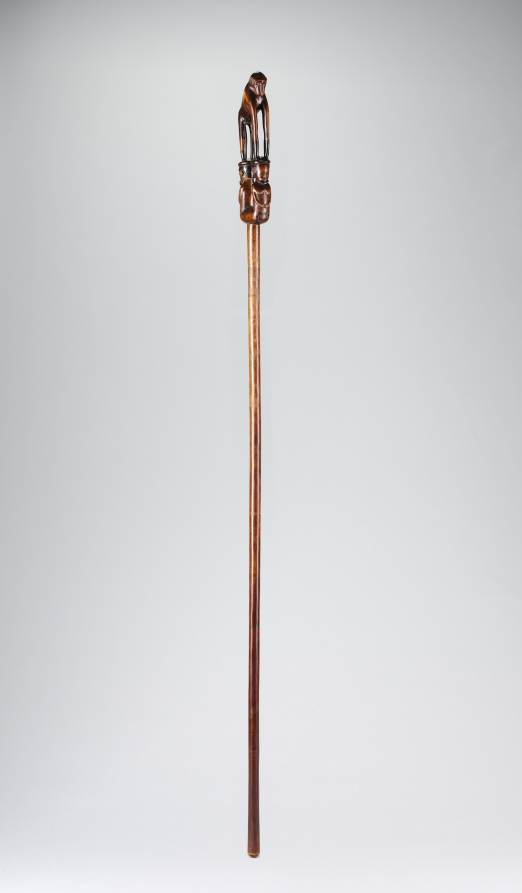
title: Staff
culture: Africa, South Africa, South Africa or Mozambique, probably Tsonga peoples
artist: The Baboon Master (probably Tsonga peoples)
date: 1800s–1900s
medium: Wood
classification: Sculpture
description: Arguably the finest surviving carving of the Baboon Master in a Western collection, this staff features exceptionally sophisticated articulation and detailing. The circular pokerwork motif on one side—which echoes the treatment of the ears on the male heads supporting the baboon—may represent a shield or a leaf. The heads feature the characteristic ornament that signifies maturity and marriage; covered with a mixture of gum, charcoal, and oil, this hairdo, called isicoco, employed a fiber or sinew ring into which the wearer’s hair was woven.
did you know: Artists working on the African continent often moved from place to place; the artist nicknamed The Baboon Master was of the Tsonga culture and worked in the Zulu kingdom.